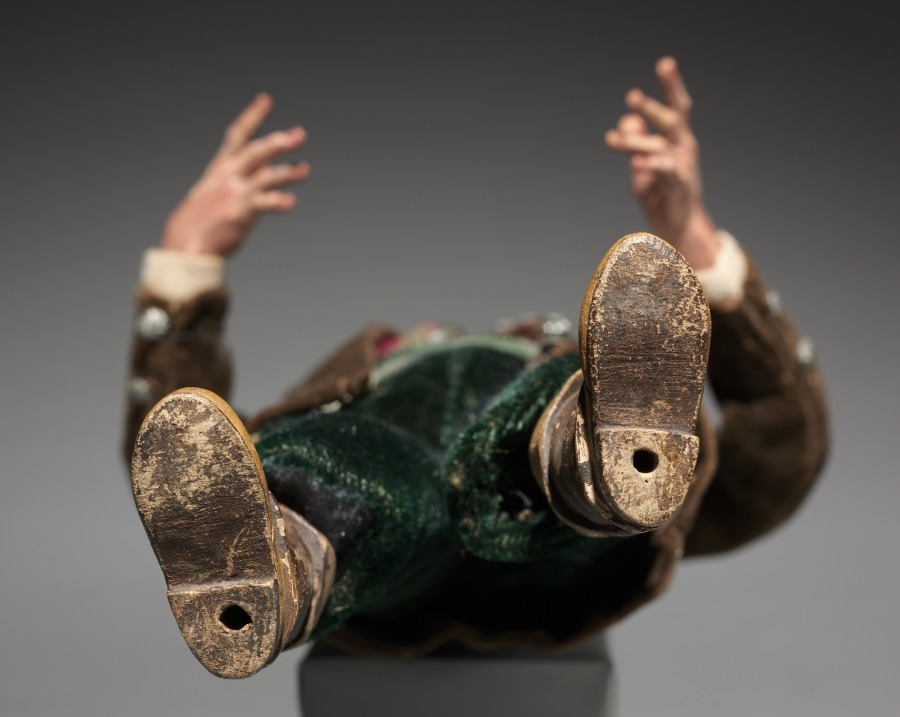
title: Figure from a Crèche: Standing Man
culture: Italy, Naples, late 18th-early 19th century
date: 1780–1830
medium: painted wood and terracotta with various textiles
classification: Sculpture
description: The practice of creating scenes of the Nativity for the home dates from the early 1700s in Italy, where people began to set up doll-like figures of about a foot or less in height. The custom was particularly popular in Naples around 1800, where crèche scenes (crèche means cradle, or crib) included many figures, whose heads and hands of painted terracotta, stuffed cloth bodies, and clothing adapted from contemporary local costumes gave them an amazingly realistic character. Representations of the birth of Jesus can be traced to the first few centuries of Christianity. Both living creatures and sculptural depictions of them were used from early times. By the late middle ages it was customary to create life-size figures of wood or stone, naturalistically painted, to represent the characters who participated in the events of Jesus's early life. These sculptures were then arranged in scenes illustrating one or both of the most important of these events, the Adoration of the Shepherds and the Adoration of the Magi-the three kings from the East who came to pay homage to the Christ child. Used in churches, these large figures were especially popular in Italy, Central Europe, Spain, and Portugal.